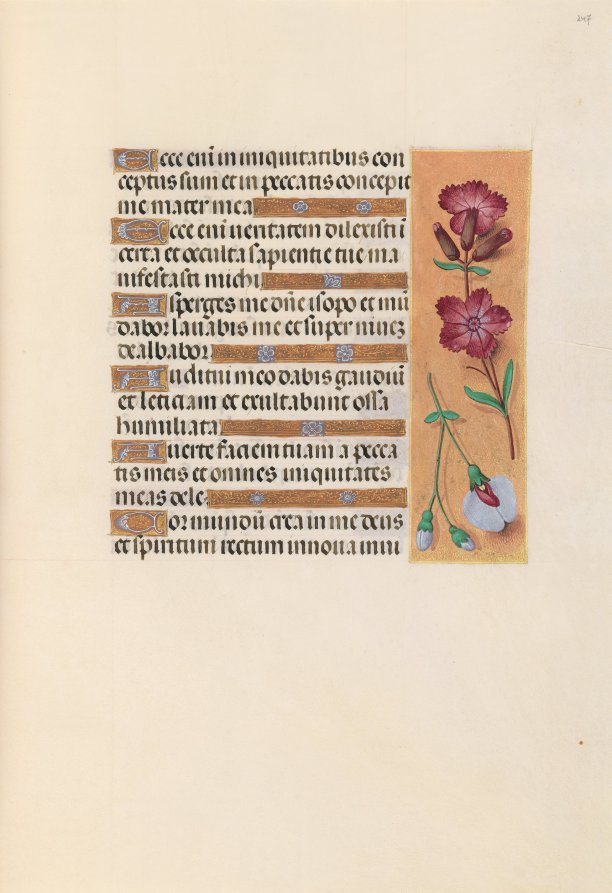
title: Hours of Queen Isabella the Catholic, Queen of Spain: Fol. 247r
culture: Flanders, Ghent and Bruges, late 15th century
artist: Master of the First Prayerbook of Maximillian (Flemish, c. 1444–1519)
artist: and Associates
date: c. 1500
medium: ink, tempera, and gold on vellum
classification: Bound Volume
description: This manuscript was illuminated by a circle of at least five highly organized manuscript painters active in the Flemish cities of Ghent and Bruges. The principal illuminator was Alexander Bening, who painted the majority of the book's miniatures. Manuscripts produced by this circle of artists are renowned for the decoration of their borders, which typically feature a rich variety of realistically-painted flowers, birds, and butterflies. This prayer book, called a book of hours, was intended not for a cleric, but for the private devotions of a lay person-in this case, Isabella the Catholic, Queen of Spain (1451-1504). Isabella's coat of arms embellishes the book's frontispiece. It is unlikely that the book was commissioned by the Queen herself; rather, she probably received it as a diplomatic gift from someone courting her patronage, perhaps Cardinal Francisco Jimenez de Cisneros. A Franciscan friar, Jimenez was dependent upon Isabella for his advancement, first to the post of Queen's confessor in 1492, and then to Archbishop of Toledo in 1495.